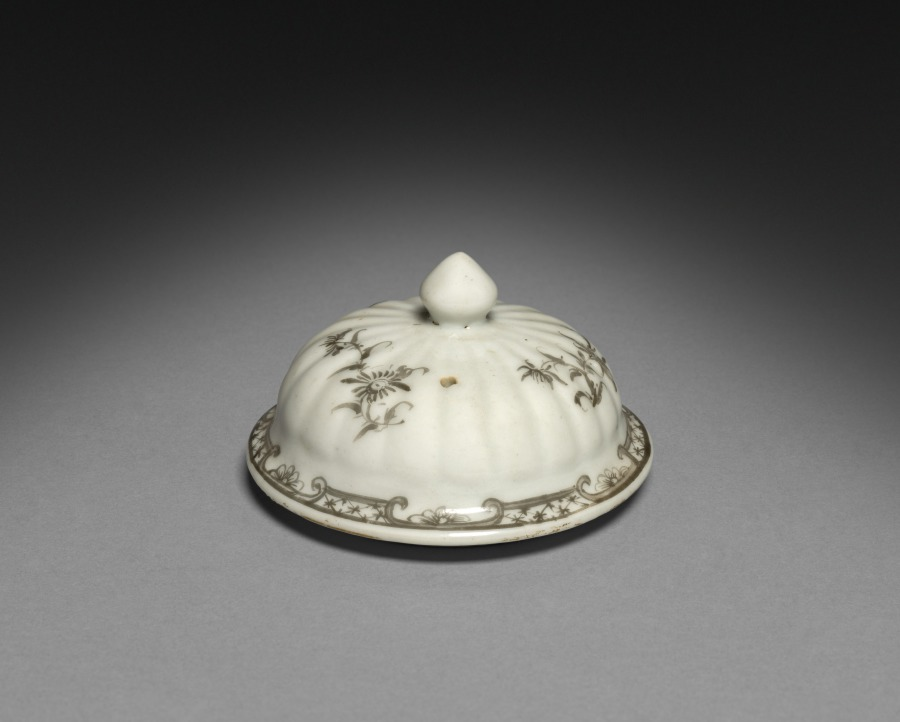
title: Teapot (lid)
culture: China, Chinese Export -- European Market, 18th century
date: c. 1750–1770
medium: porcelain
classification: Ceramic